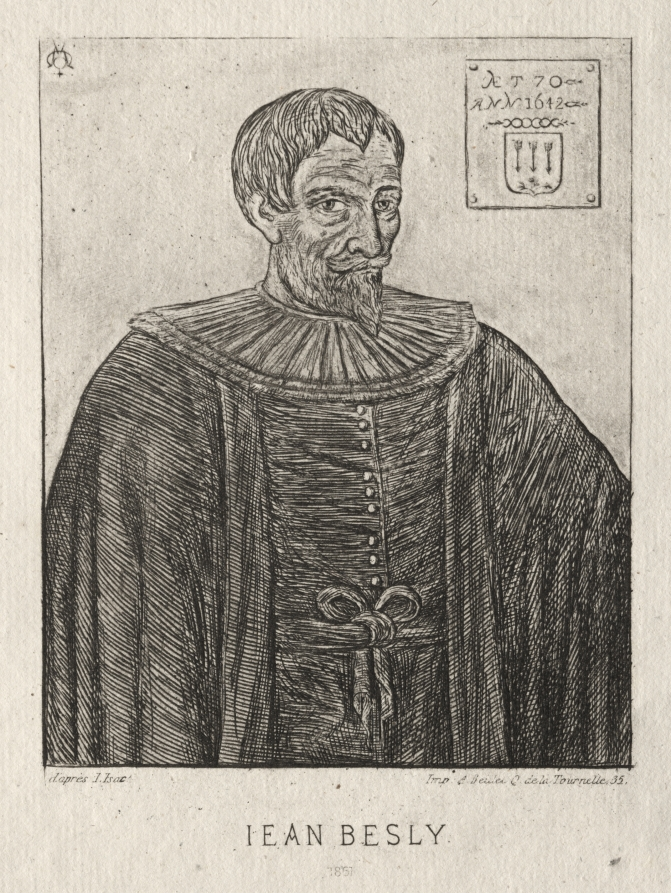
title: Jean Besly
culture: France, 19th century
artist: Charles Meryon (French, 1821–1868)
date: 1861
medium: etching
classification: Print